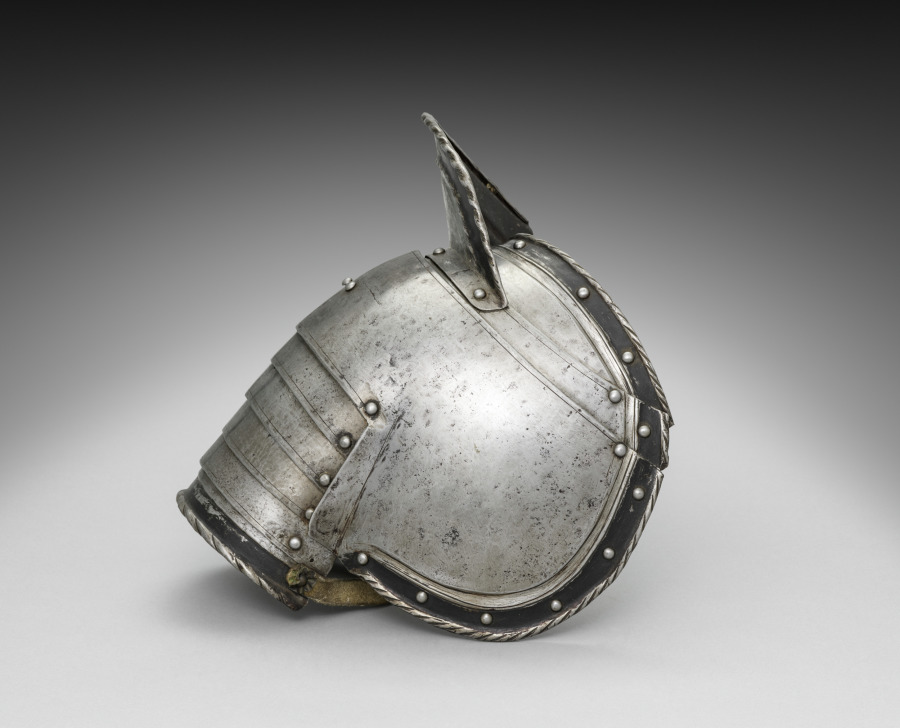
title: Left Pauldron with Guard Brace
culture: Germany, 19th century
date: 1801–1900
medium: steel with black paint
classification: Arms and Armor